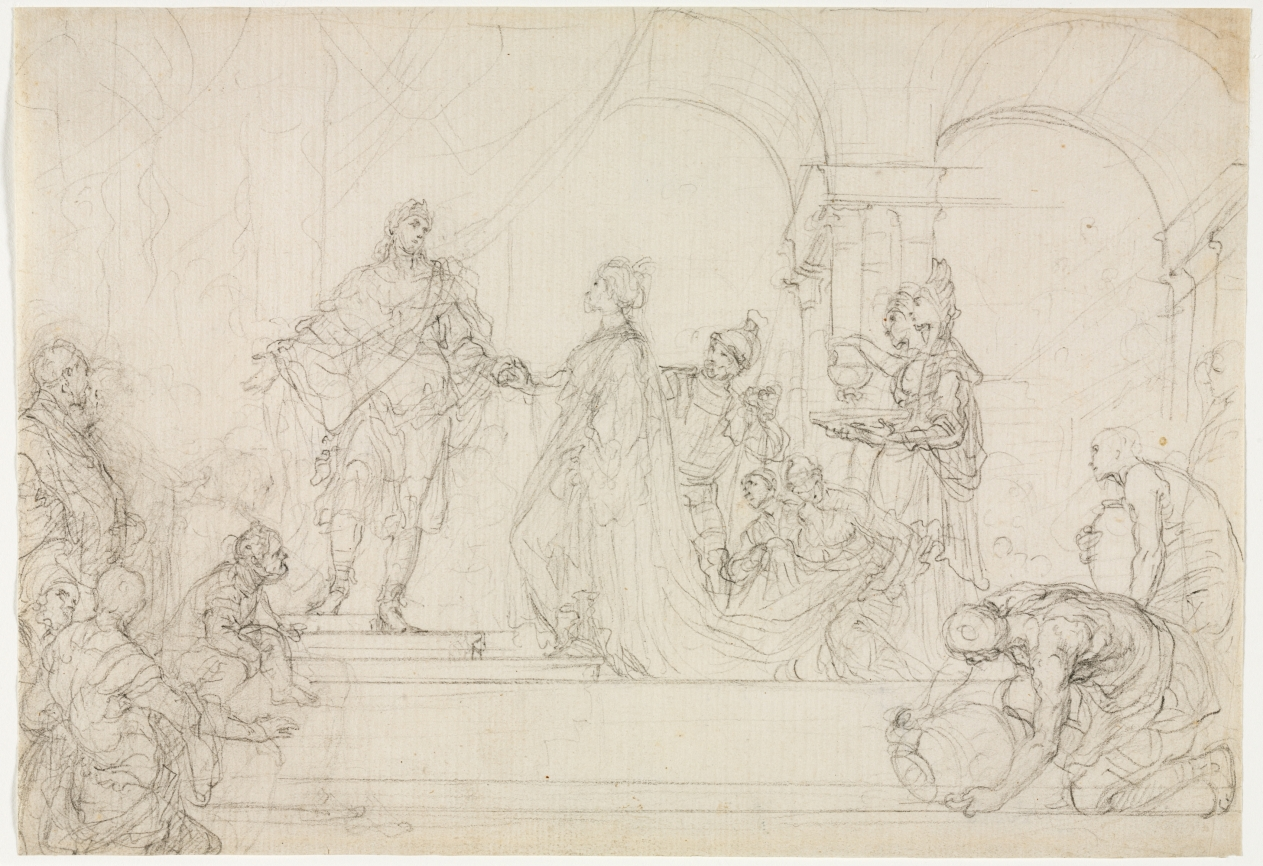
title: Meeting of Solomon and Queen of Sheba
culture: Italy, 18th century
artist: Francesco Solimena (Italian, 1657–1747)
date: late 1600s-1747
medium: black chalk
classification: Drawing